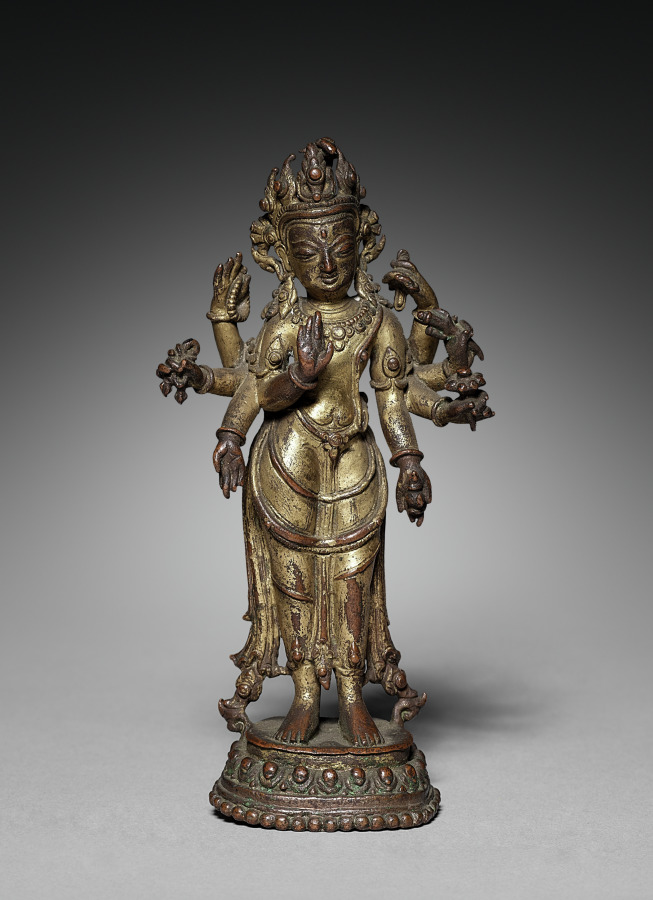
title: Lokesvara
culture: Nepal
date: 1600s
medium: gilded copper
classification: Sculpture